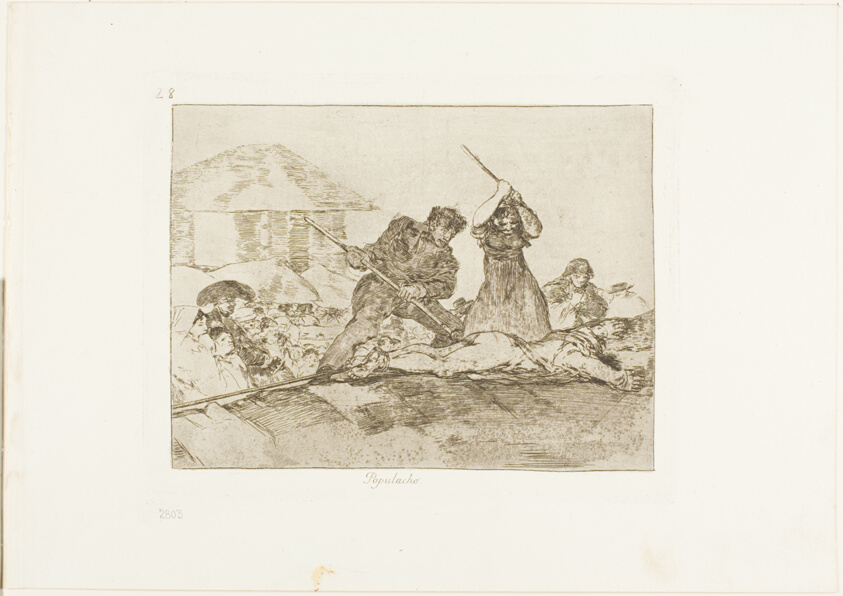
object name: Print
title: Rabble, plate 28 from The Disasters of War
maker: Francisco José de Goya y Lucientes (Spanish, 1746-1828)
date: 1814/20, published 1863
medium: Etching, lavis, drypoint, burnishing and burin on ivory wove paper with gilt edges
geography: Spain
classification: etching; print; prints and drawing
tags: war